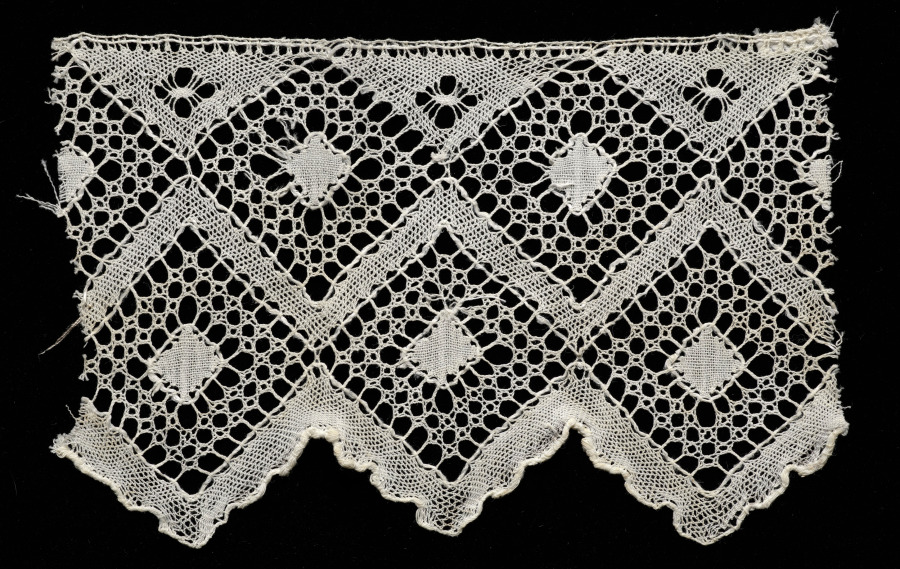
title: Lace Border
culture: Spain, Seville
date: 1700s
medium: Bobbin lace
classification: Lace